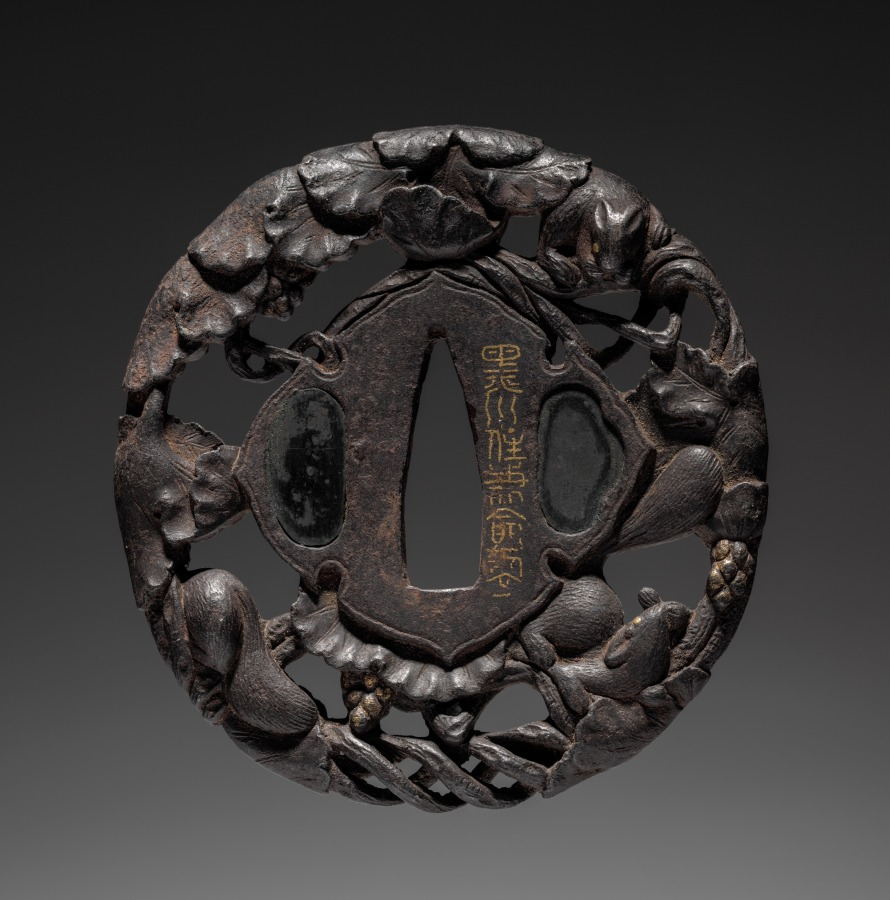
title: Sword Guard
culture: Japan, Edo period (1615–1868)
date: early 1800s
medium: iron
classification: Arms and Armor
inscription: Signature: Kanemitsu, residing at Sumidagawa, made